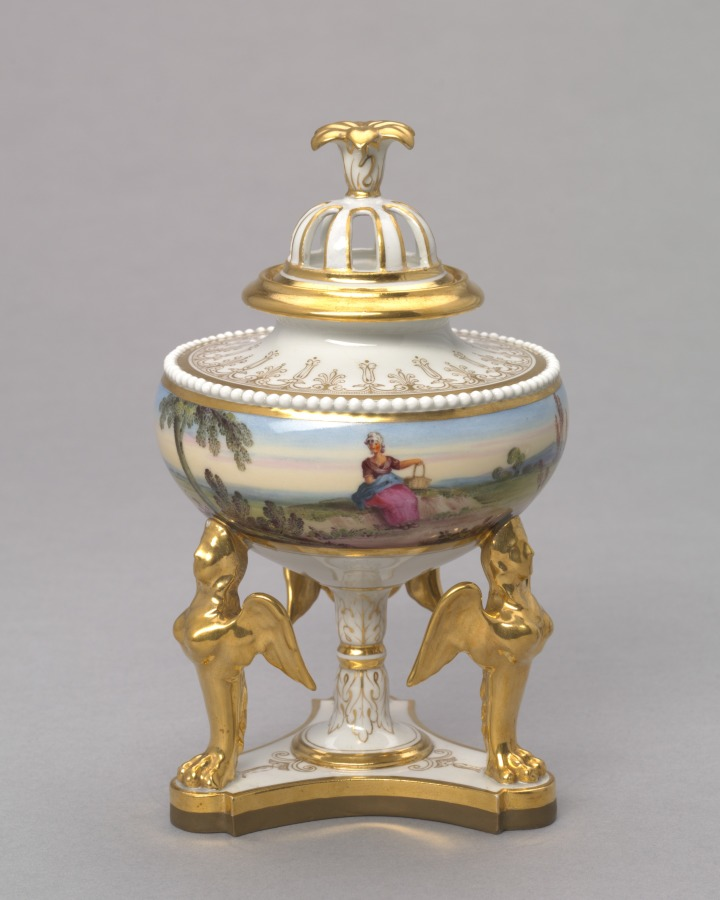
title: Urn and cover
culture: England, Worcester, 19th century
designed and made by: Flight, Barr and Barr (British)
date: c. 1815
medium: artificial porcelain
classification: Ceramic